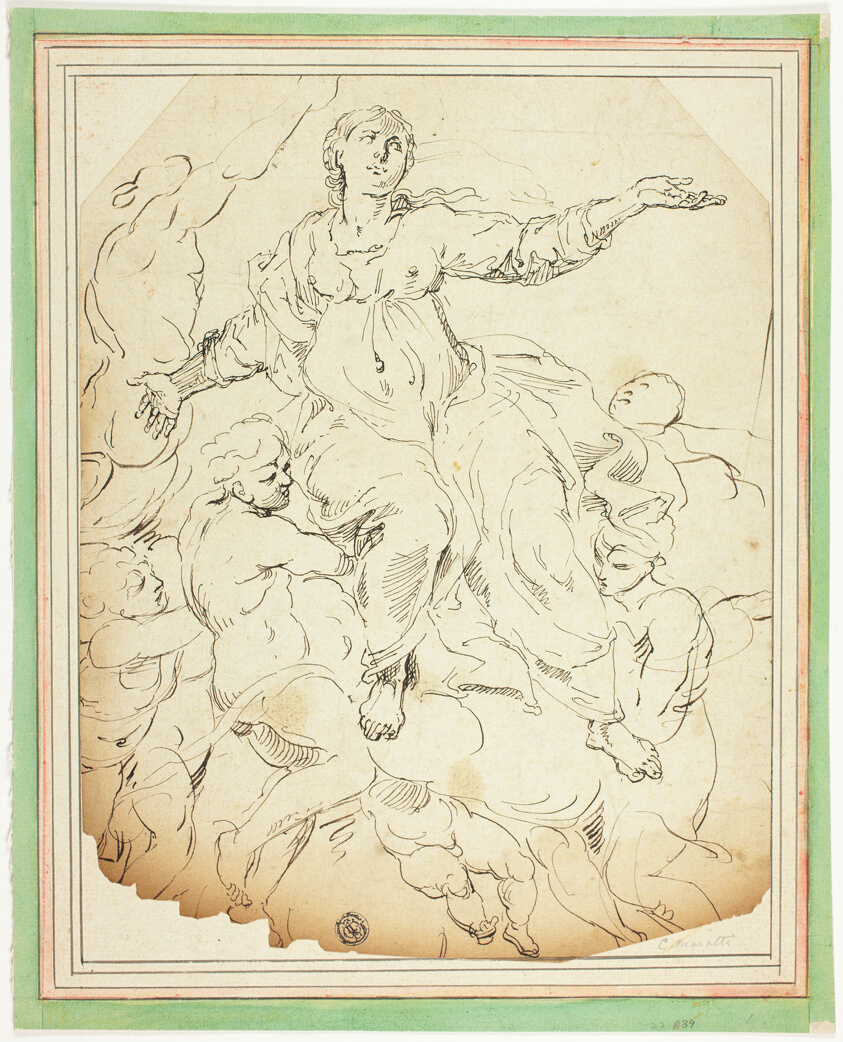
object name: Drawing and Watercolor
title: Assumption of the Virgin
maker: After Carlo Maratti (Italian, 1625-1713); or possibly Raymond de Lafage (French, 1656-1690)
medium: Pen and brown ink on tan laid paper, laid down on ivory laid card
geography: France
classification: pen and ink drawings; drawings (visual works); prints and drawing